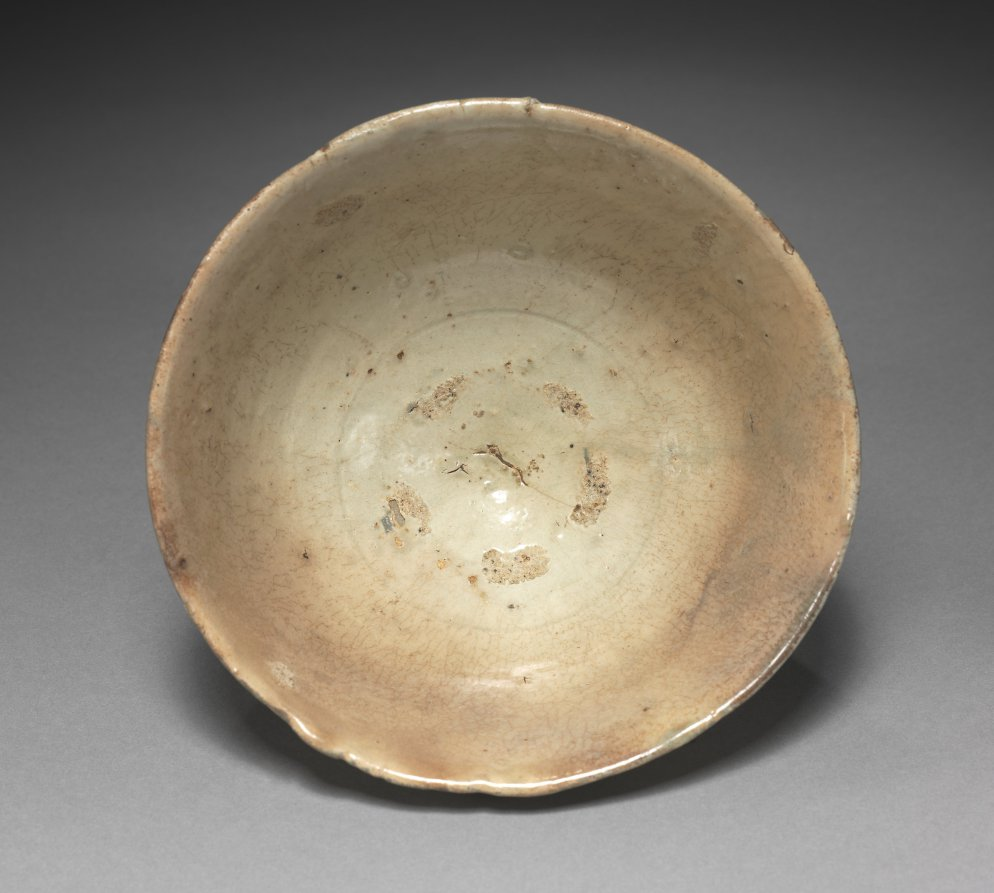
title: Tea Bowl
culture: Korea, Joseon dynasty (1392–1910)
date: 1700s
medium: stoneware with white slip and overglaze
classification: Ceramic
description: This type of wide-mouthed bowl was used every day in Korea, not exclusively for tea drinking. But when it was introduced to Japan around the early 16th century, its imperfect appearance, which evokes the aesthetics of wabi-sabi, caused it to be repurposed as a tea bowl. Korean tea bowls were circulated as a item of foreign luxury among Japanese military elites. Possibly produced in one of the kilns established by the trading office (Waegwan) in Busan, southern Gyeongsang province, this type of tea bowl was sold to Japanese tea bowl collectors. According to a historical record dated to 1641, one trading boat shipped more than 14,000 tea bowls to Japan.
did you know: This type of rustic-looking tea bowl was produced in one of the kilns established by the trading office (Waegwan) in Buan, southern Gyeongsang province, for Japanese tea bowl collectors who admired the beauty of imperfection.